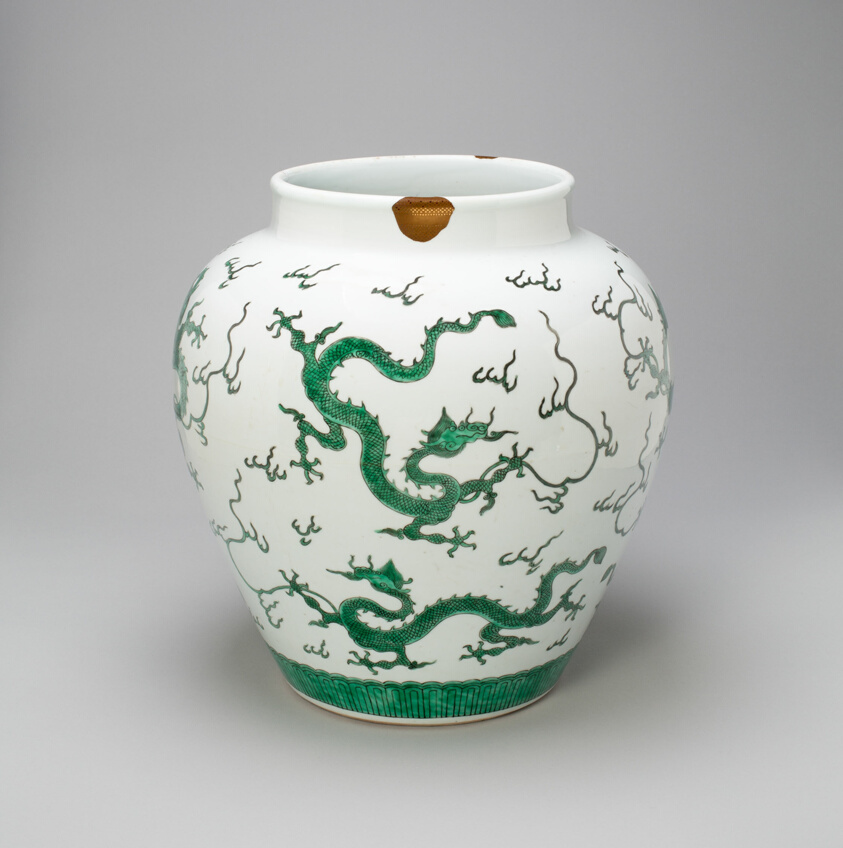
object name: Vessel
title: Jar with Dragons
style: Chinese (culture or style)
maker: China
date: Qing dynasty (1644–1911), Kangxi period (1662–1722)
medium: Porcelain painted in overglaze enamel with gold repairs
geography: China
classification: porcelain; ceramics; asian art; vessel